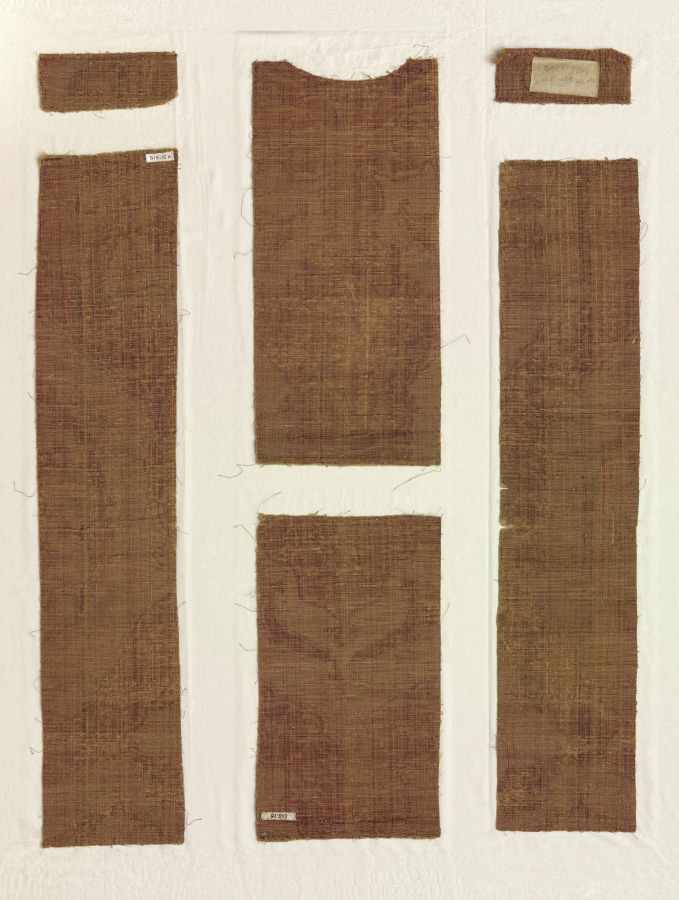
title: Fragments from Chasuble Front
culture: Italy, early 16th century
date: early 1500s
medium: velvet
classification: Velvet